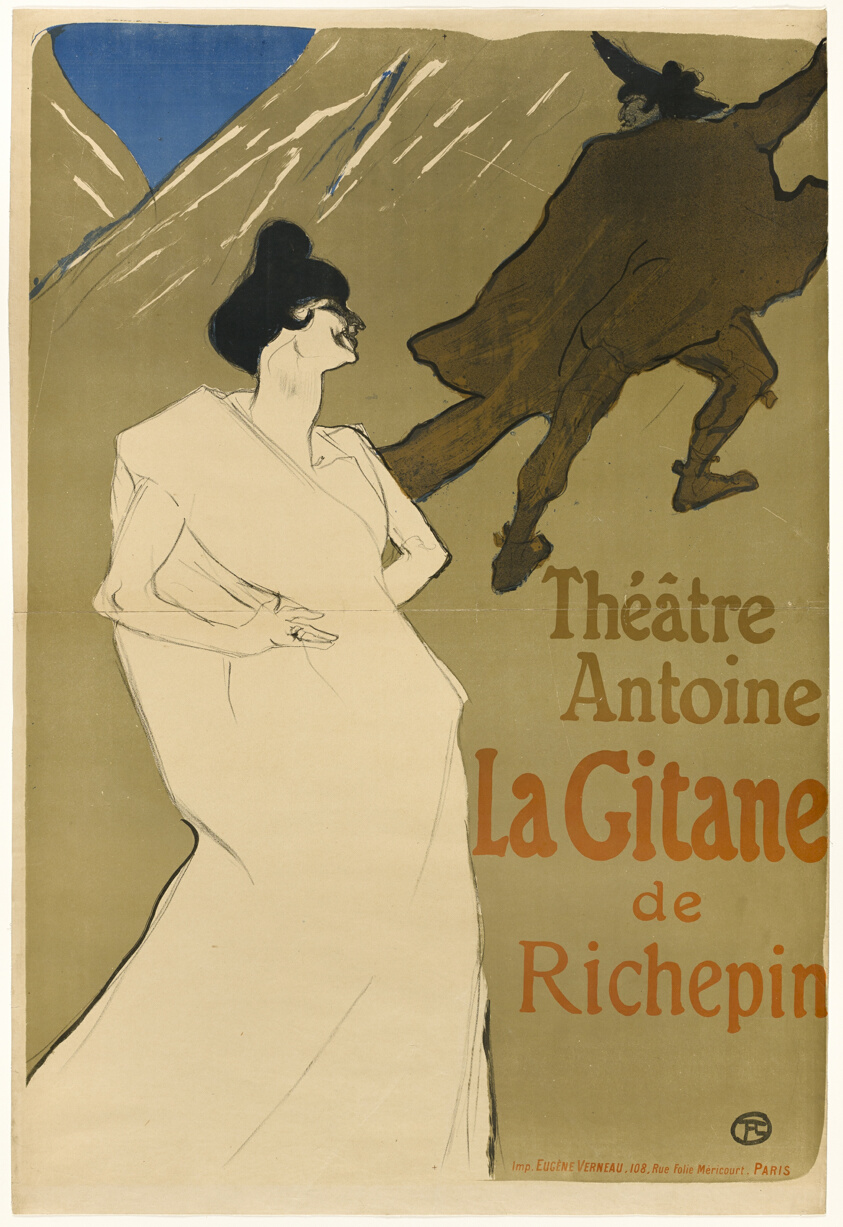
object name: Print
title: La Gitane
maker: Henri de Toulouse-Lautrec (French, 1864-1901)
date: 1899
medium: Color lithograph poster on two sheets of cream wove paper, laid down on unbleached Irish linen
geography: France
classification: lithograph; print; prints and drawing; poster